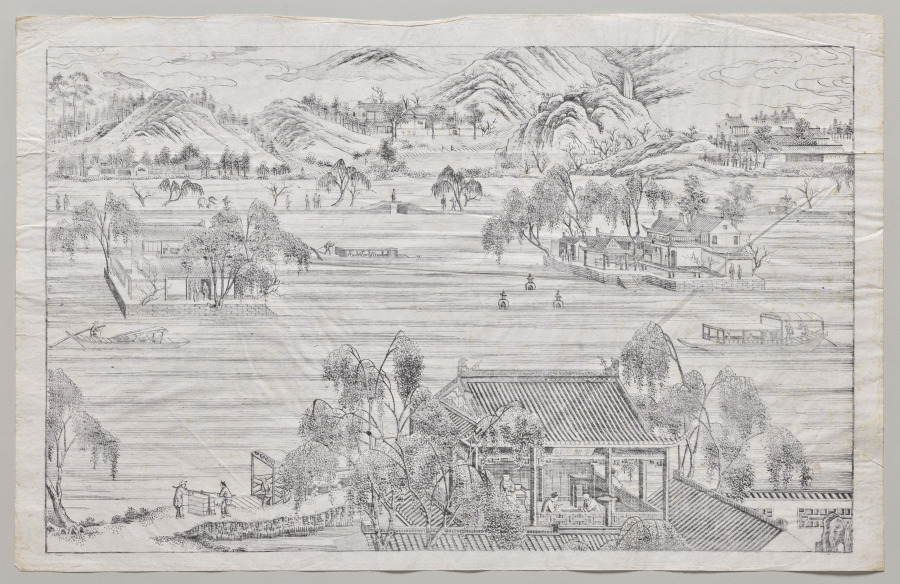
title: Westlake Panorama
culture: China, Qing dynasty (1644–1911), Qianlong reign (1736–95)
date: mid-1700s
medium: One of four woodblock prints; ink on paper; printed with three woodblocks in shades of black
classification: Print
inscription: 信德號 姑蘇管瑞玉頂細西洋畫發客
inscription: The 10 scenes on the four prints are identified by their titles: Print one: 1. Remnant Snow on Broken Bridge (Duanqiao canxue, 斷橋殘雪), 2. Lotus Breeze at Qu Winery (Quyuan fenghe, 曲院風河 [sic]). Print two: 3. Autumn Moon over Placid Lake (Pinghu qiuyue, 平湖秋月), 4. Twin Peaks Piercing the Clouds (Liangfeng chayun, 兩峰插云), 5. Spring Dawn at Su Dike (Sudi chunxiao, 蘇 堤春曉), 11. The emperor’s temporary palace (xinggong, 行宮). Print three: 6. Listening to the Orioles by the Willow Ripples (Liulang wenying, 柳浪 聞鶯), 7. Three Stupas and the Reflecting Moon (Santan yinyue, 三潭印月). Print four: 8. Watching Fish at Flower Cove (Huagang guanyu, 花港觀魚), 9. Sunset at Leifeng Pagoda (Leifeng xizhao, 雷峰夕照). 10. Evening Bell from Nanping Hill (Nanping wanzhong, 南屏晚鍾.) In print two, 11. the emperor’s temporary palace (xinggong 行宮) is also identified.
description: Revived by the southern imperial inspection tours, West Lake imagery became a popular subject during the early Qing dynasty. This panorama is composed of four prints, showing the Ten Scenes of the West Lake in Hangzhou along with other sights. The vanishing point perspective and the hatching lines that depict shading, water, or sky derive from European copperplate prints, introduced by missionaries to China, and were celebrated novelties in 18th-century Suzhou prints. These prints also reached Europe to furnish 18th-century palace interiors.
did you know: Woodblock printing in color reached a height in China in the 1600s to 1700s. The prints were executed by means of sets of separate blocks, each carved to print a different color.